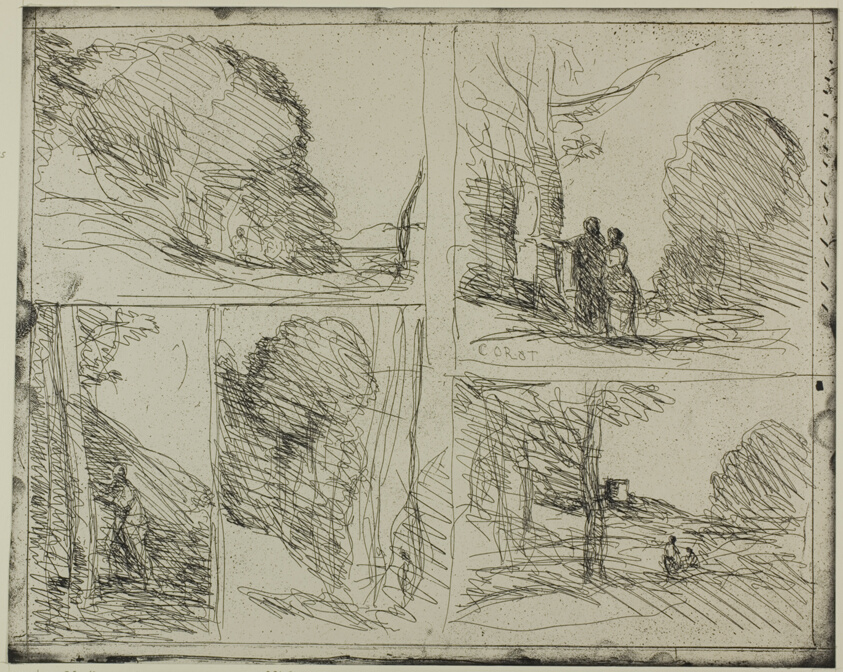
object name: Print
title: The Garden of Pericles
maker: Jean-Baptiste-Camille Corot; French, 1796-1875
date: 1856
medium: Cliché-verre on ivory photographic paper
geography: France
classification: cliché-verre; print; prints and drawing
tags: gardens